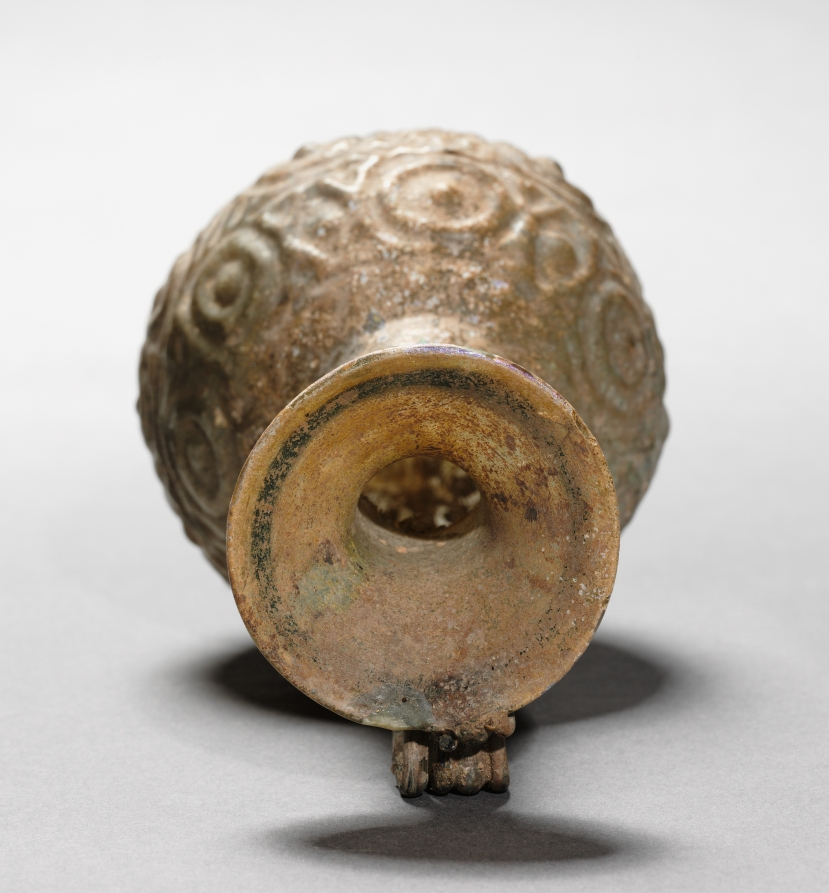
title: Pitcher with Handle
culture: Roman, Syro-Palestinian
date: 300s CE or later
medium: glass, mold-blown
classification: Glass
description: Featuring a globular mold-made body with three bands of geometric ornament (mostly concentric circles) in low relief, this pitcher could have been used for pouring water, wine, or other liquids. The separately made handle, decorated with four vertical ribs, is attached below the wide mouth by means of a coil.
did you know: Even the underside of this pitcher’s base is decorated, with a mold-made sunburst pattern.